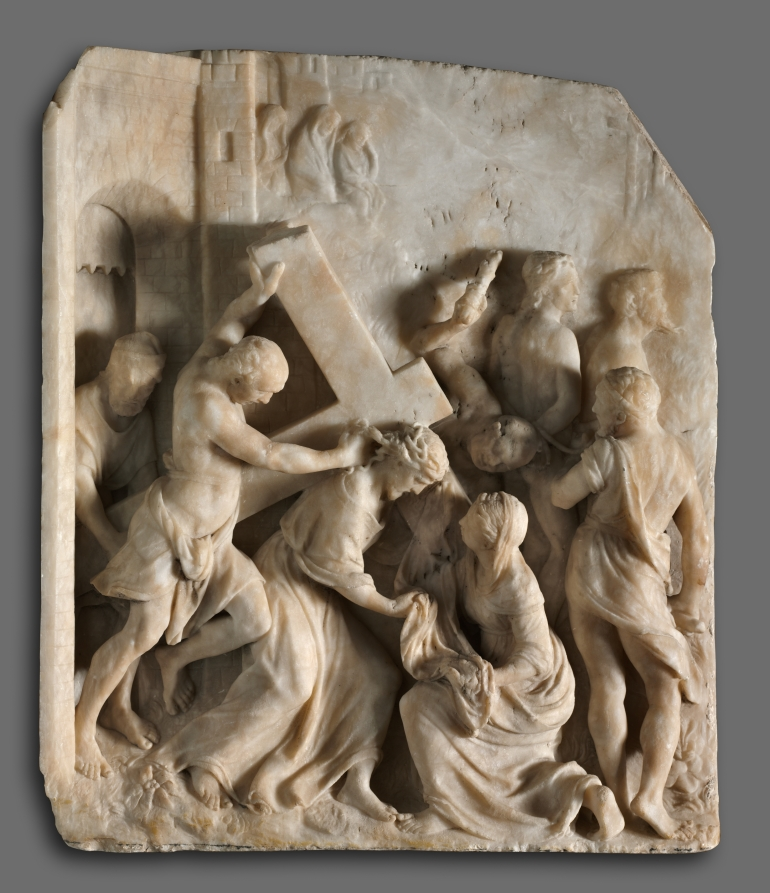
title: Christ Carrying the Cross with Saints Simon and Veronica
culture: South Netherlands, Hainault, 16th century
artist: workshop of Jacques Dubroeucq (Netherlandish, 1500/10–1584)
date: c. 1545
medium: alabaster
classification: Sculpture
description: As Christ dragged his cross through the streets of Jerusalem, Veronica wiped sweat from Christ’s face, which was miraculously imprinted on the fabric. This relief probably came from a choir screen, a barrier between the altar and the congregation, common in medieval churches. Yet the sculpture is more classical than medieval. The artist, yet to be identified, clearly knew the work of Dubreoucq, an artist who brought a taste for Italian Renaissance sculpture to northern France and present-day Belgium. The use of alabaster instead of marble exploits a material local to this part of Europe.